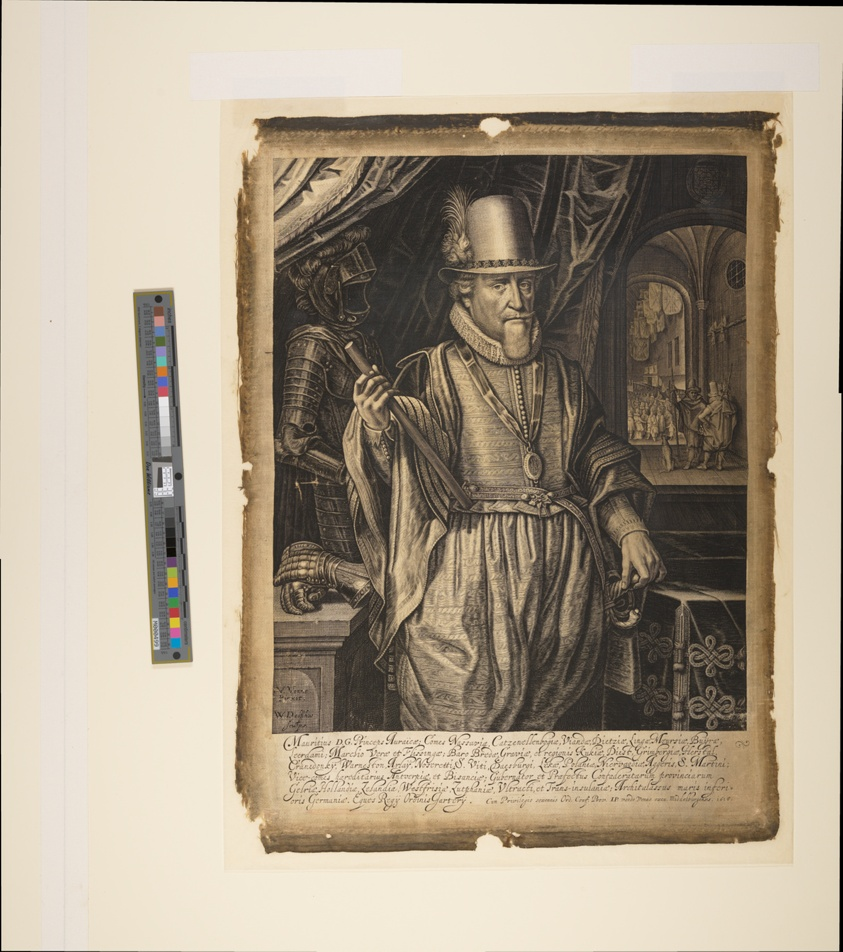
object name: Print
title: Maurits, Prince of Orange-Nassau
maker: Willem Jacobsz Delff (Dutch, 1580–1638); after Adriaen van de Venne (Dutch, 1589–1662)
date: 1618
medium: Engraving on silk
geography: Netherlands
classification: engraving; print; prints and drawing; silk